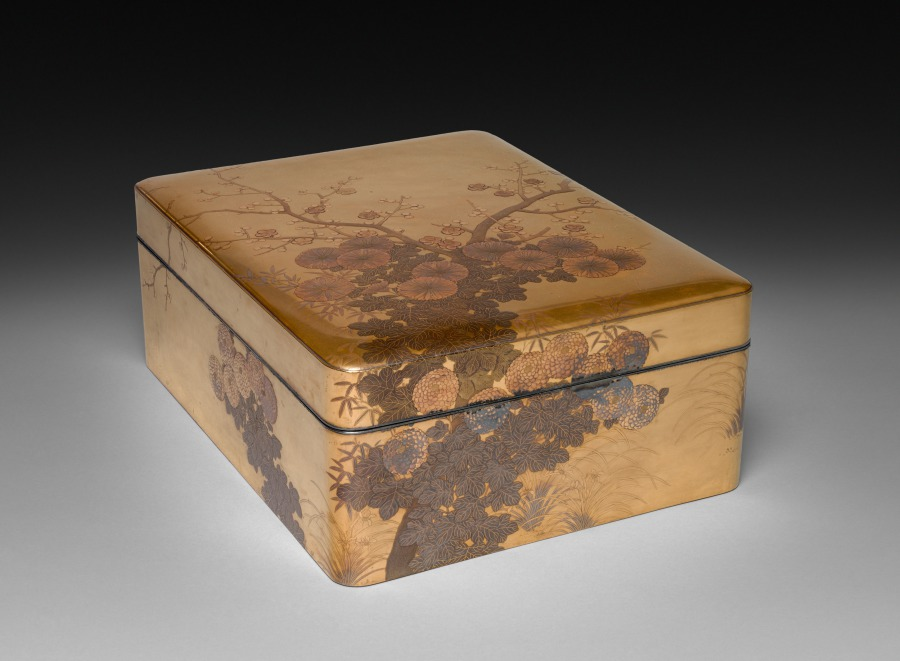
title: Document Box (Ryōshibako) with Chrysanthemum and Plum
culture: Japan, Meiji period (1868–1912)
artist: Sasaki Takayasu (Japanese, 1845–1929)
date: late 1800s-early 1900s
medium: Lacquer over wood with gold and silver sprinkled powder (maki-e)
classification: Lacquer